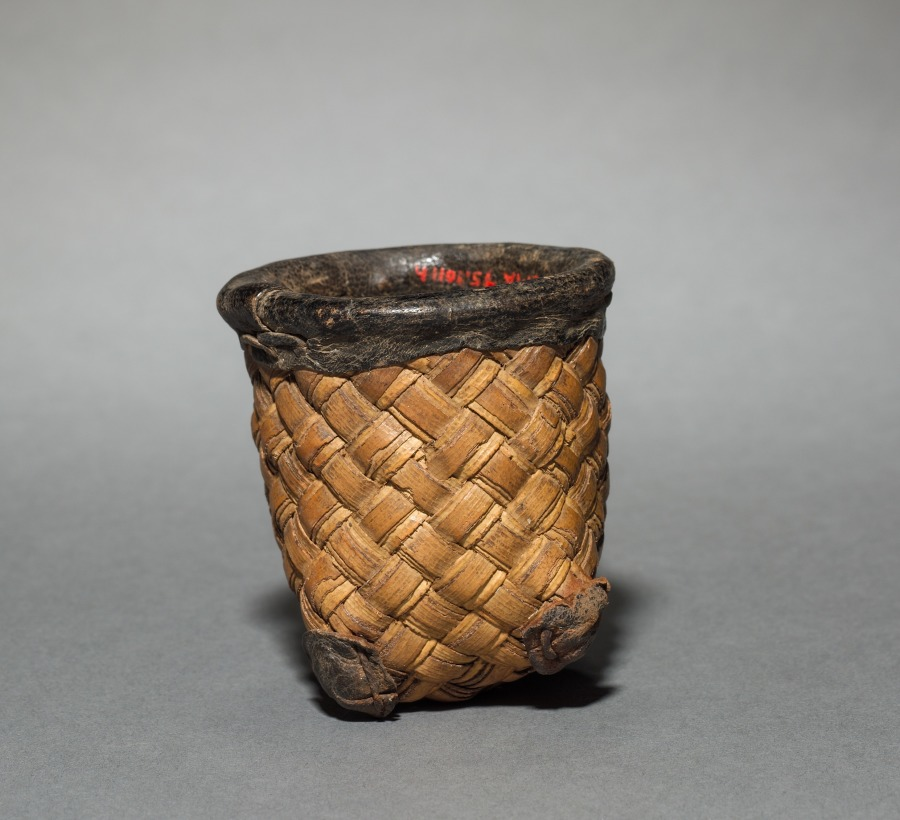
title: One of Ten Nesting Wedding Baskets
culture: Africa, Western Africa, Burkina Faso, Lobi–style maker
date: c. 1900s?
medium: Plant fiber and leather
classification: Vessels